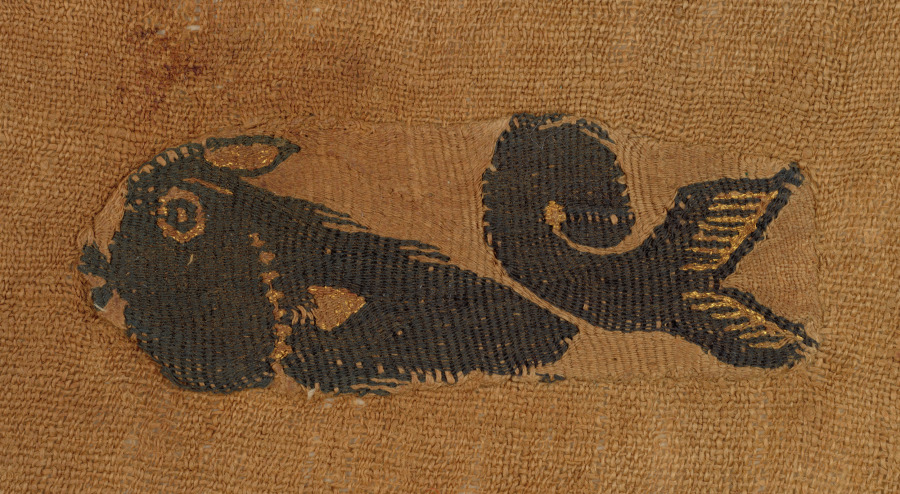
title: Two Fragments from a Curtain: Dolphins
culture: Egypt, Byzantine period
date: 400s - 500s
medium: tapestry (originally inwoven in tabby ground); wool, linen and gold filé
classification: Textile